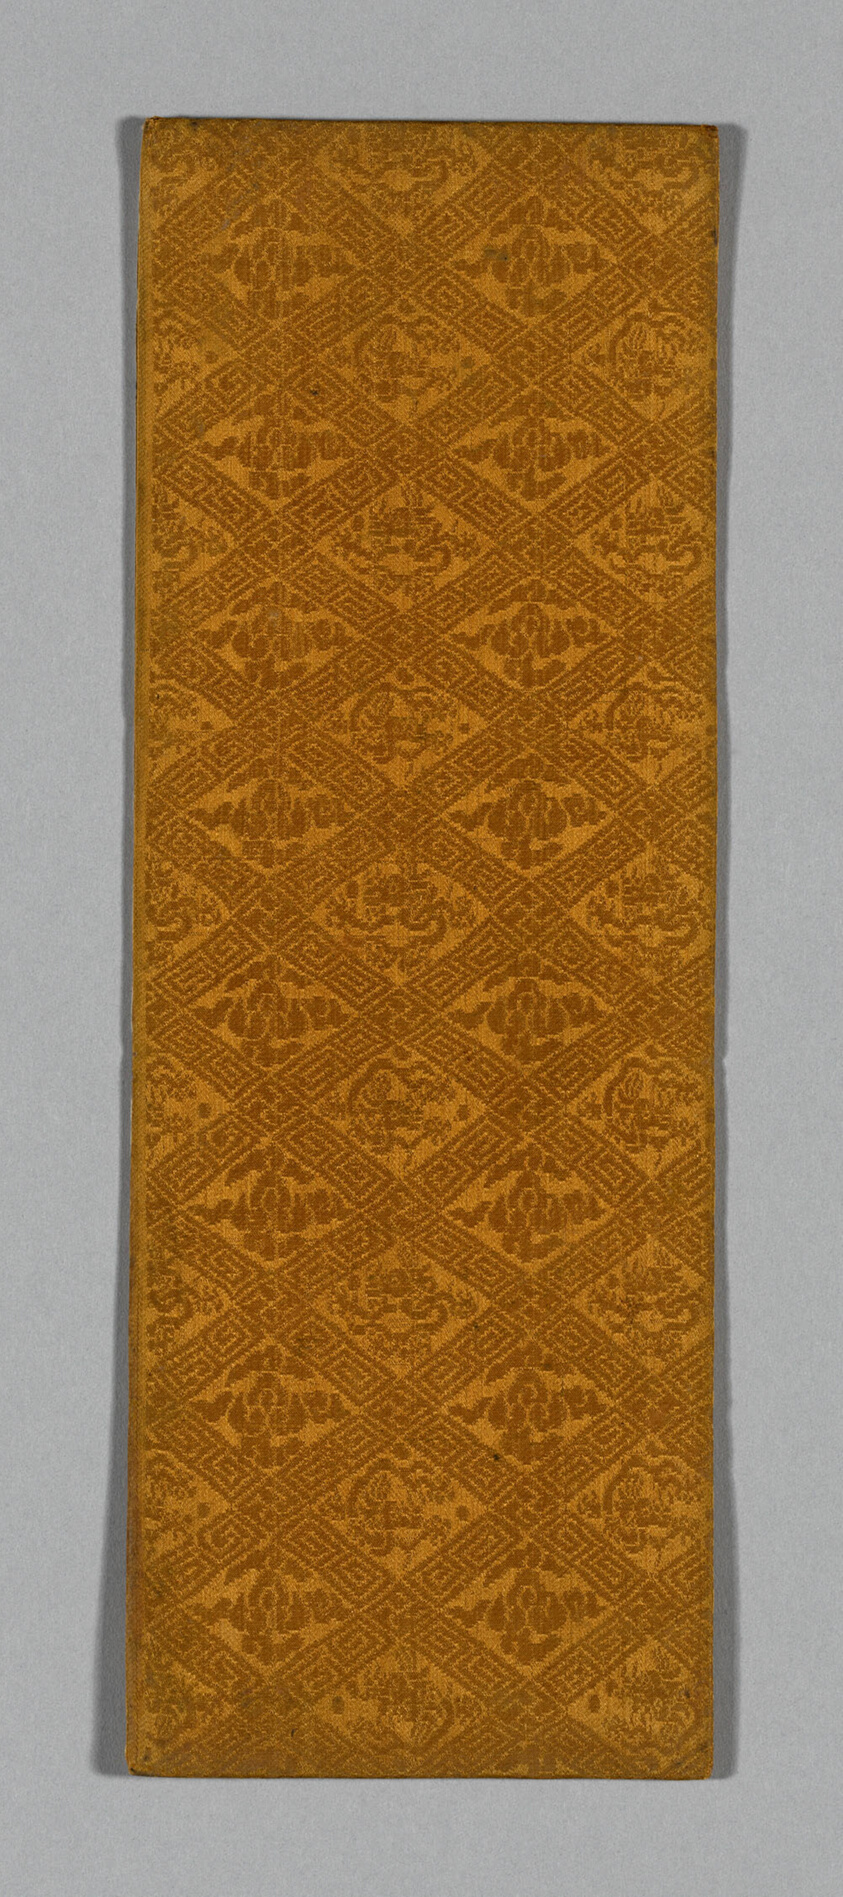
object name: Textile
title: Sutra Cover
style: ming, Chinese (culture or style), East Asian, asian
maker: China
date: Ming dynasty (1368–1644), c. 1590's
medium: Silk, 4:1 satin damask weave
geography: China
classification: textile; weaving